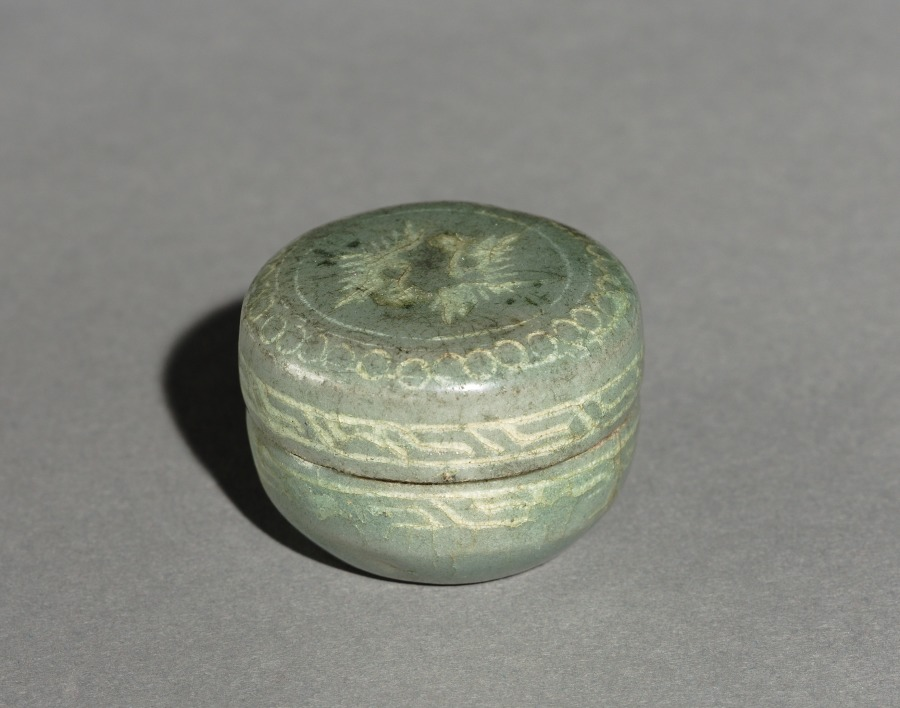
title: Box and Cover with Inlaid Crane Design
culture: Korea, Goryeo dynasty (918–1392)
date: 1200s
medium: celadon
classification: Ceramic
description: Celadons, spoons, seals, and bronze mirrors were the most common burial objects in tombs during the Goryeo period (918-1392). Once used to contain color powder, rouge and eyebrow gel for makeup, this small container was one of the standard goods that furnished elites' tombs. Goryeo-period women and men used the grain powder of rice or millet for whitening their skin, safflower extract for rouge, and plant ash or soot for eyebrow gel. Yet, natural-looking make-up seems to have been the most favorable one in Korea according to the travelogue by Xu Jing (1091-1153), the Chinese diplomat who visited Korea in 1123.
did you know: This ceramic container was used to store either incense or cosmetics.